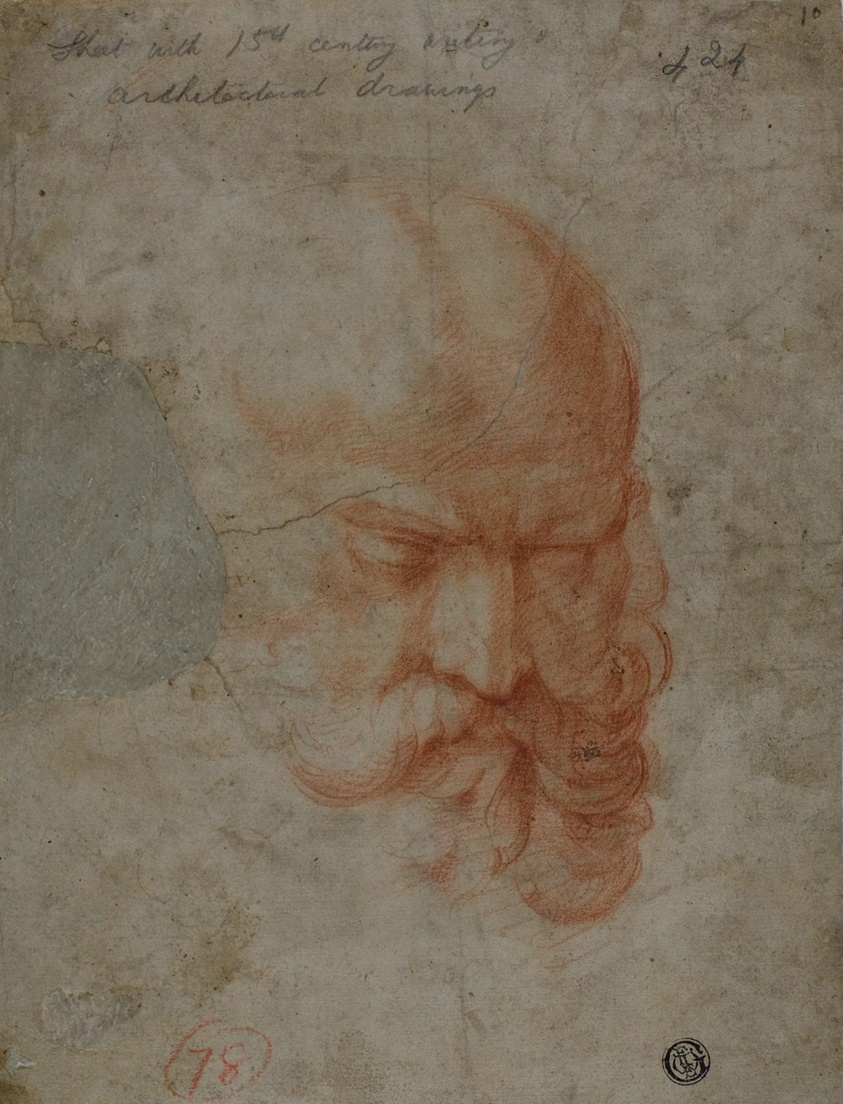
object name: Drawing and Watercolor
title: Head of a Bearded Man (recto) Sketches of Architectural Details (verso)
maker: Unknown Artist; Italian, early 16th century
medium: Red chalk (recto) and pen and brown ink (verso) on buff laid paper, pieced and laid down on buff laid paper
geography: Italy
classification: chalk; drawings (visual works); prints and drawing